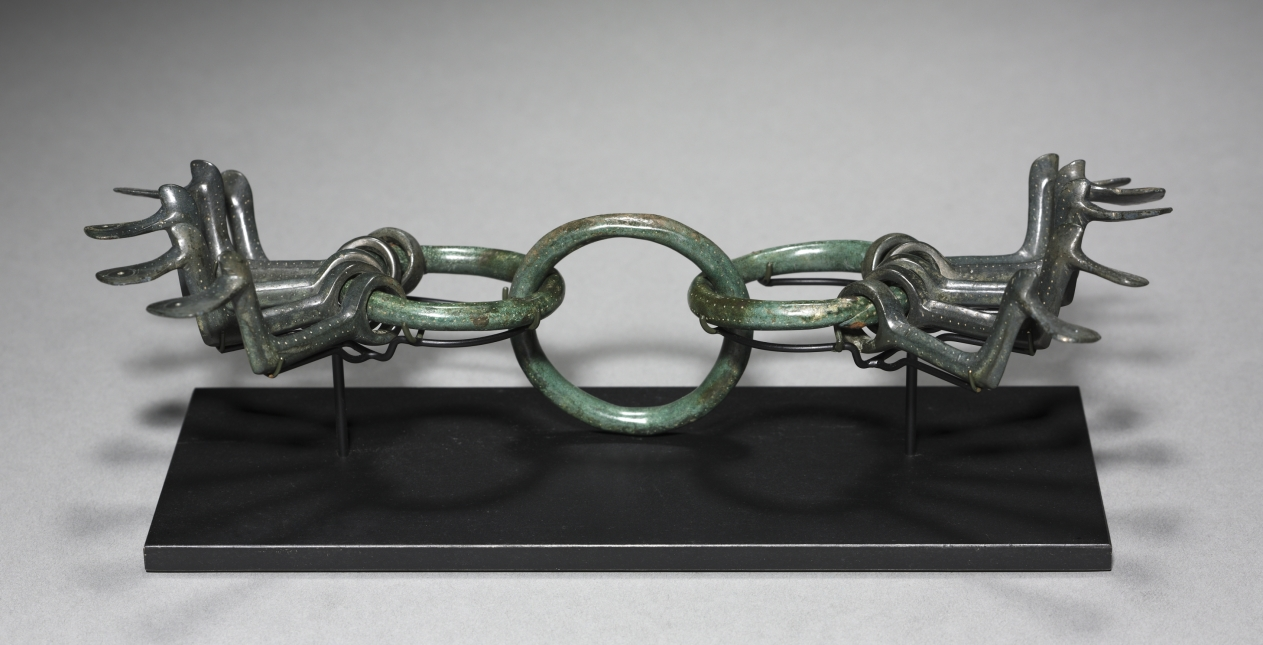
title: Cauldron Ornament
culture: Central Europe, Bronze Age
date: c. 1200 BCE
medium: bronze with iron rivets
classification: Metalwork